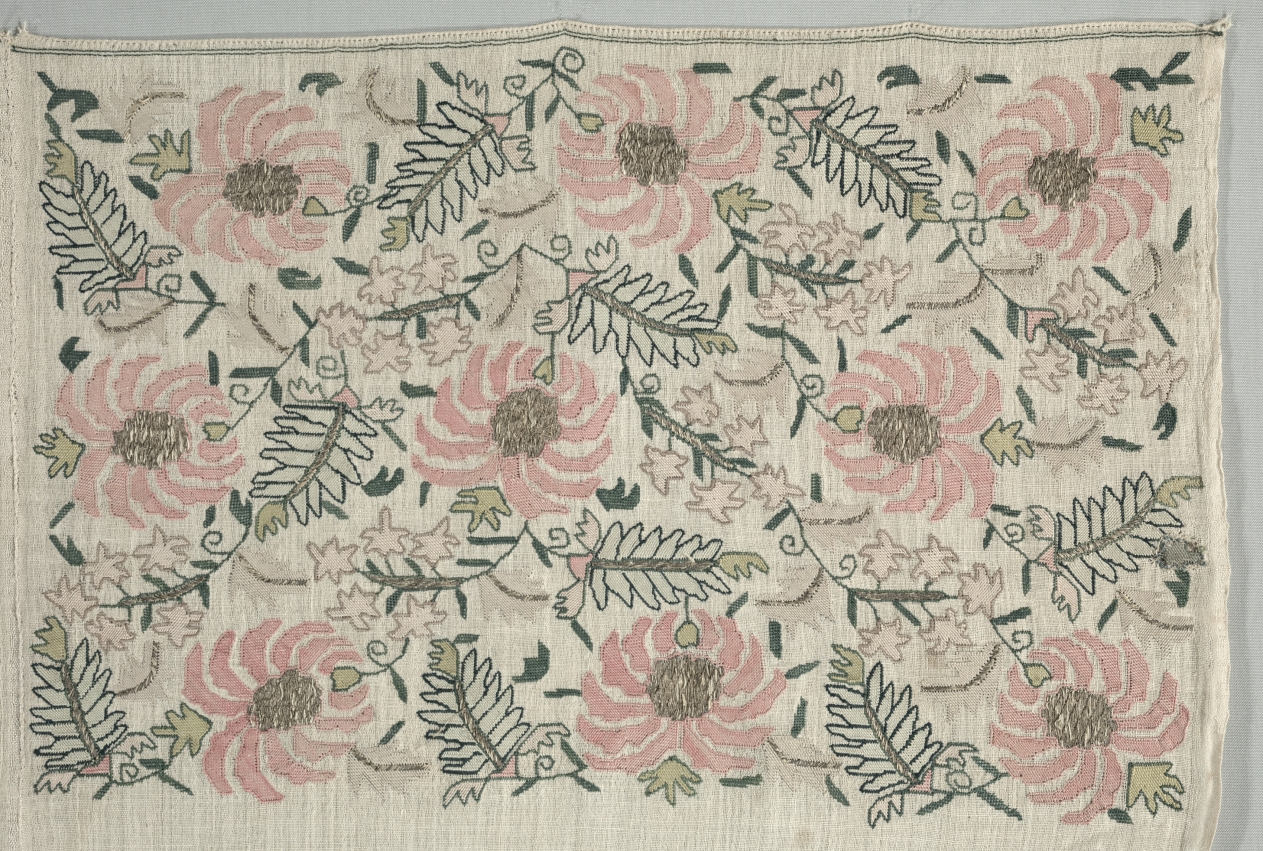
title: Embroidered Bed Spread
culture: Turkey, 18th century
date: 18th century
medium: embroidery: silk on linen tabby ground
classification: Embroidery